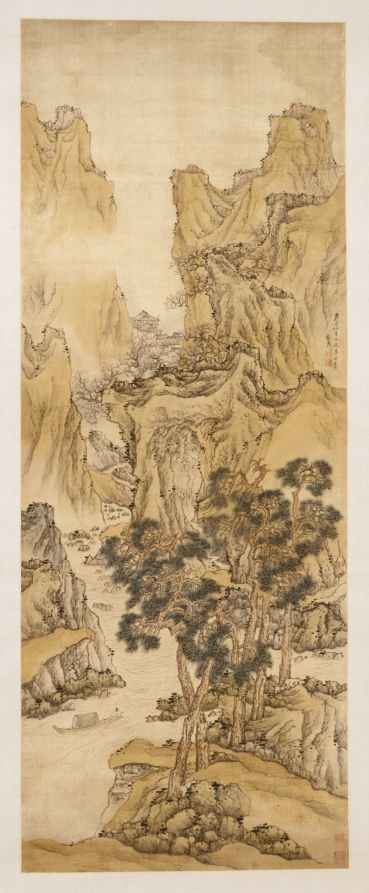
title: The Peach Blossom Spring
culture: China, Ming dynasty (1368–1644)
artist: Liu Du (Chinese, active c. 1628-after 1653)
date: 1650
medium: hanging scroll; ink and light color on satin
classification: Painting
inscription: Artist's inscription, signature, and 2 seals at middle right edge: In the tenth month of the gengyin year [1650], painted in imitation of Zhao Chengzhi [Chao Mengfu]. Liu Du [seals] Liu Du zhi yin; Shu xian.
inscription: 2 additional seals of Low Chuck Tiew 劉作籌 (1911–1993).